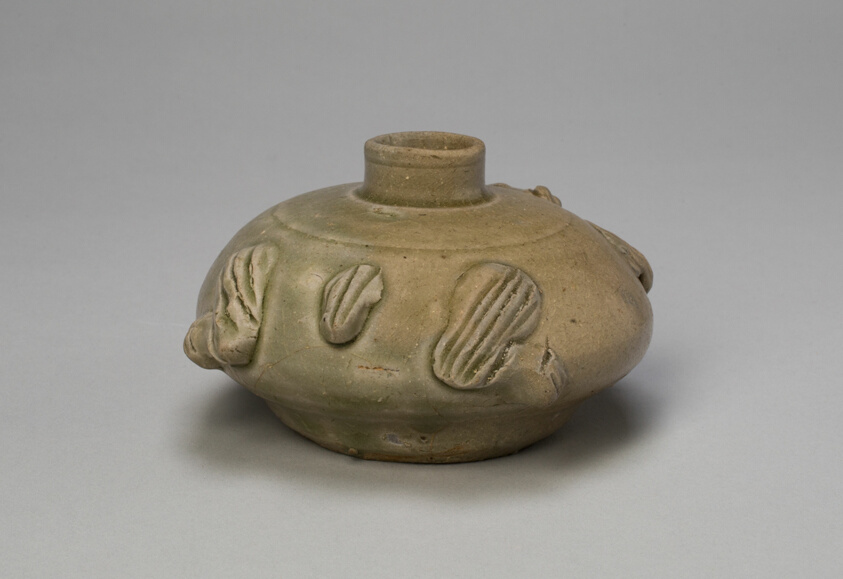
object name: Vessel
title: Frog-Shaped Jarlet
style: Chinese (culture or style)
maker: China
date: Western Jin dynasty (265–316), late 3rd century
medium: Yue ware; stoneware with underglaze molded decoration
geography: China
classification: stoneware; asian art; ceramics; vessel